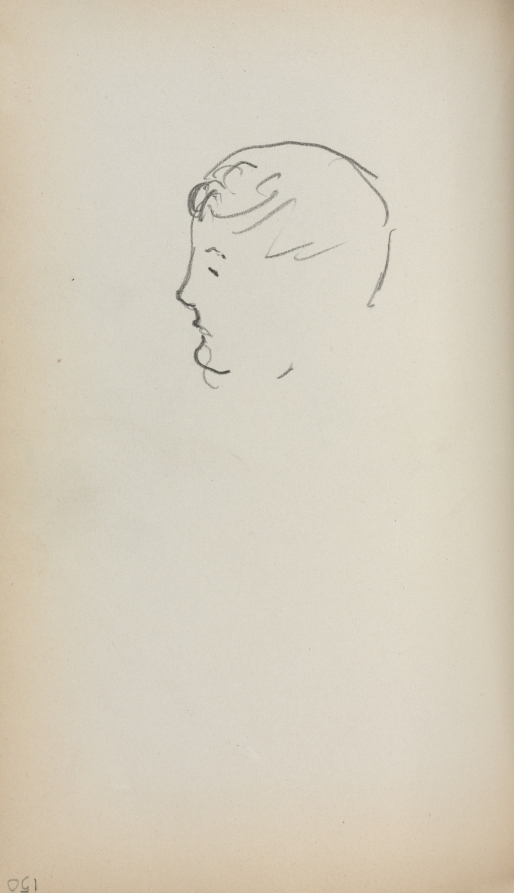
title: Italian Sketchbook: Head of a Man in Profile (page 150)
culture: America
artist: Maurice Prendergast (American, born Newfoundland [now Canada], 1858–1924)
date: 1898–1899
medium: pencil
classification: Bound Volume